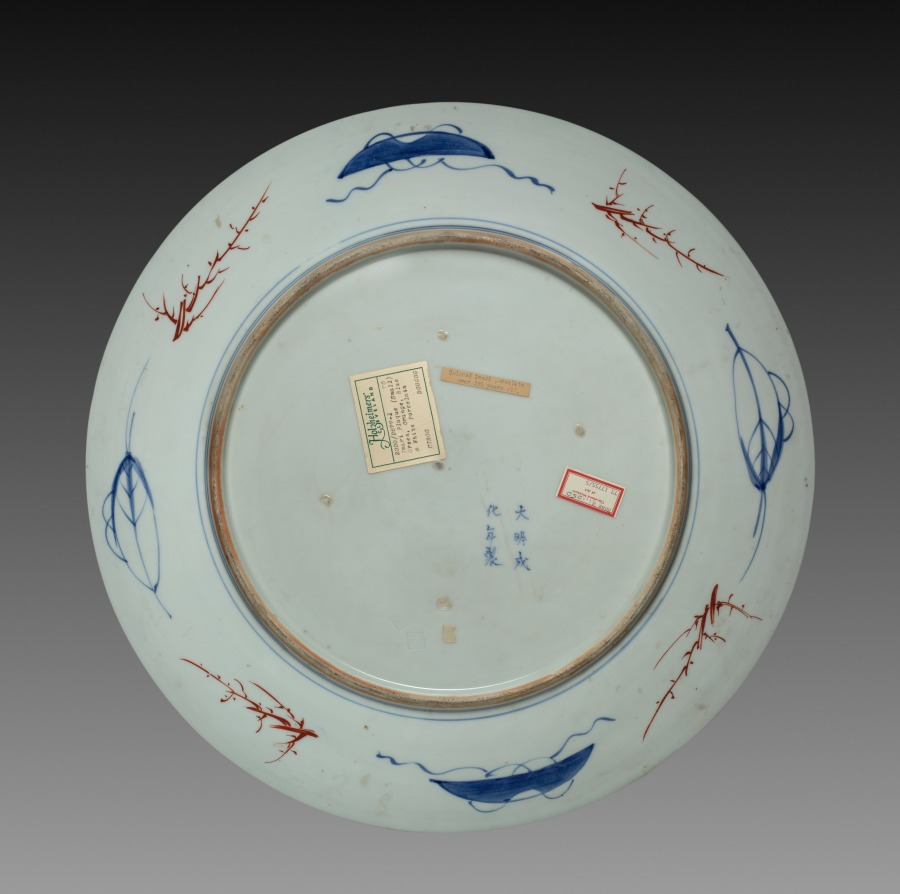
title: Dish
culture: Japan, Meiji period (1868–1912)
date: late 1800s-early 1900s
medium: overglaze enameled porcelain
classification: Ceramic